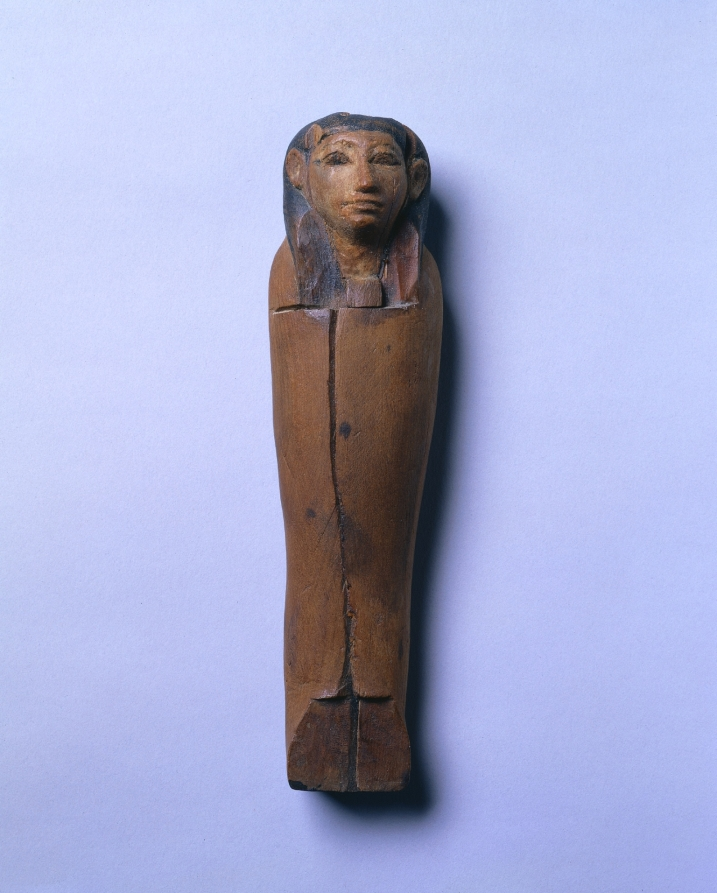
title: Model Mummy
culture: Egypt, Middle Kingdom (2040–1648 BCE), Dynasty 12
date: 1980–1801 BCE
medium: painted cedar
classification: Funerary Equipment